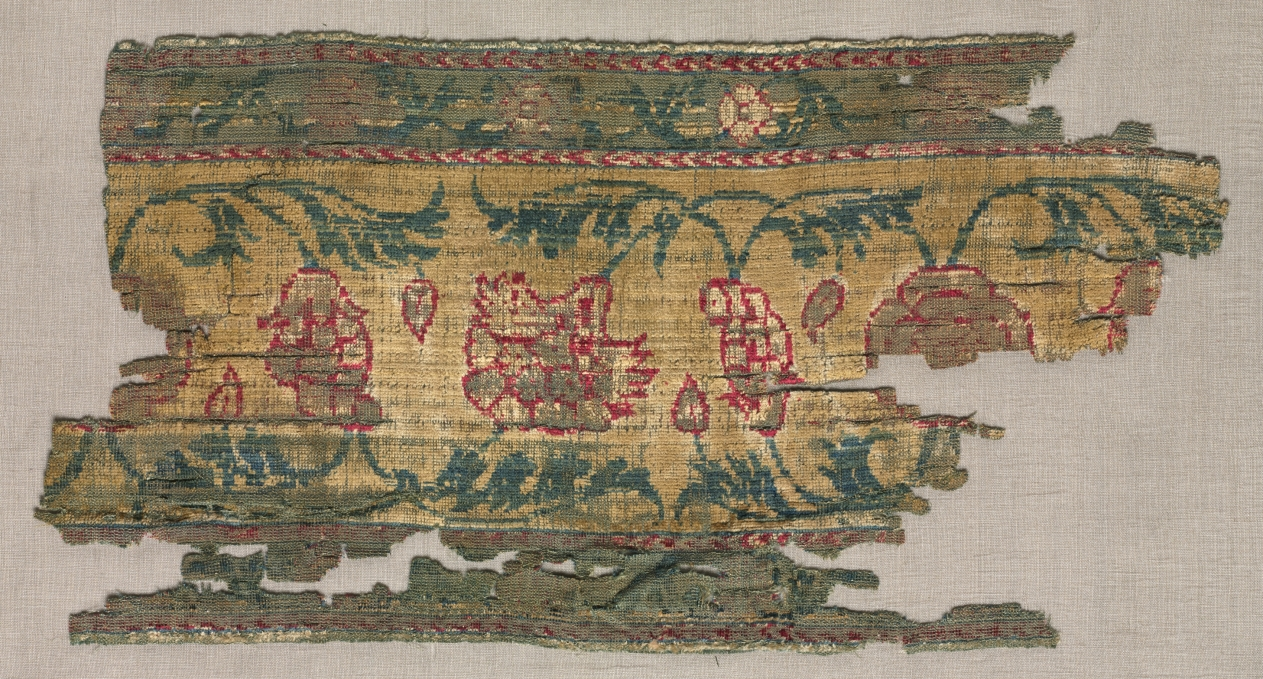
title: Fragment of a Carpet Border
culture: India, 16th century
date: 1500s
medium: velvet (pile weave) with silk and metal thread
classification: Carpet